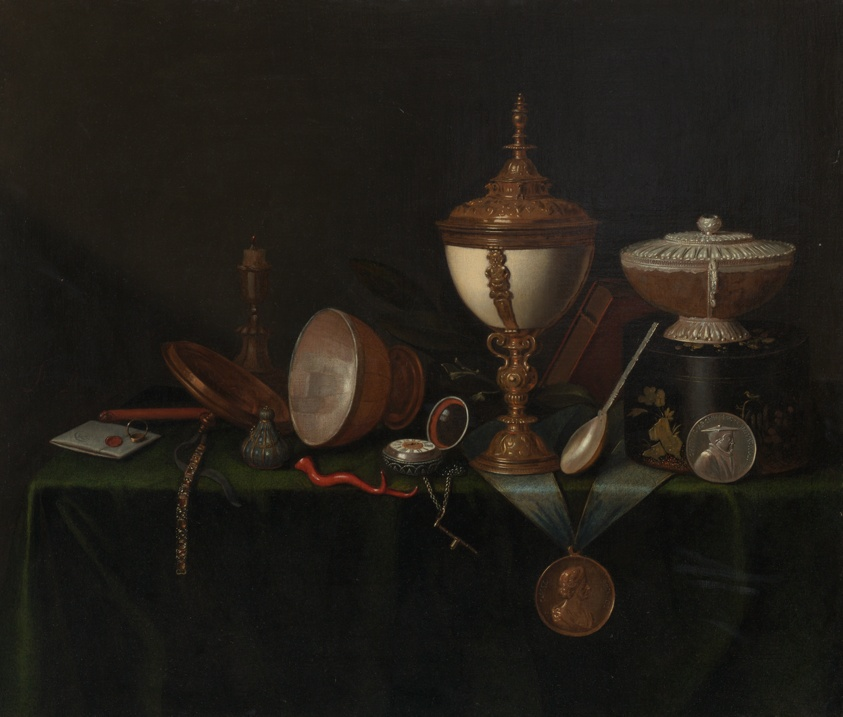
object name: Painting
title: Still Life with Ostrich Egg Cup and the Whitfield Heirlooms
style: 17th Century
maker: Pieter Gerritsz. van Roestraeten (Dutch, 1630–1700)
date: c. 1670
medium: Oil on canvas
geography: Netherlands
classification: painting; still life; paint; oil paintings (visual works); oil on canvas; dutch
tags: still life, eggs, cup, coral, watches, medallions, medals, spoon, letters (correspondence), coins, jewelry, candles, luxury, wealth, silver, pearls